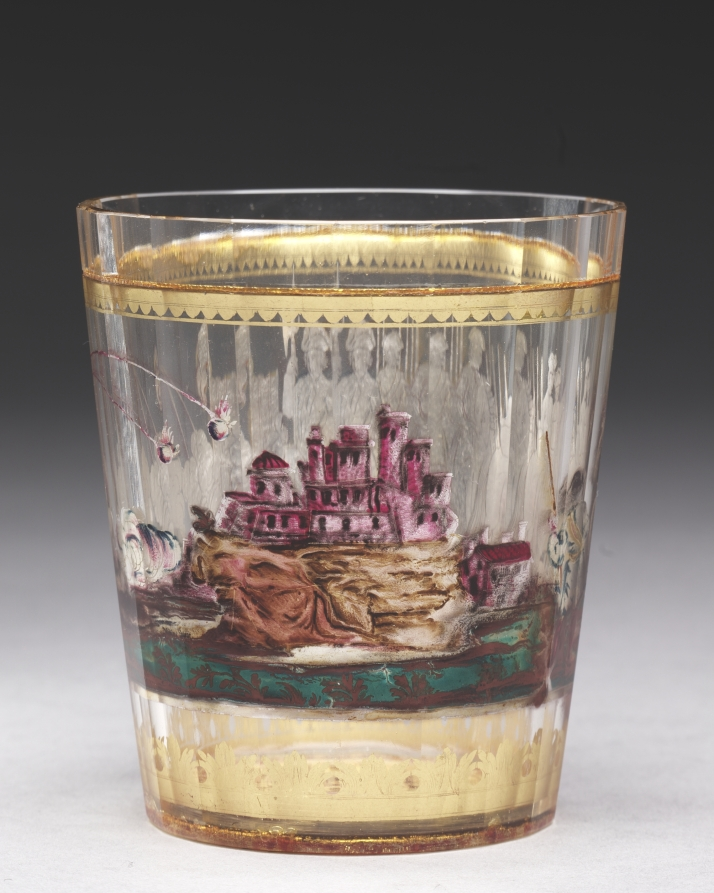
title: Tumbler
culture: Bohemia, 18th century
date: c. 1730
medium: zwischengoldglas (glass)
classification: Glass